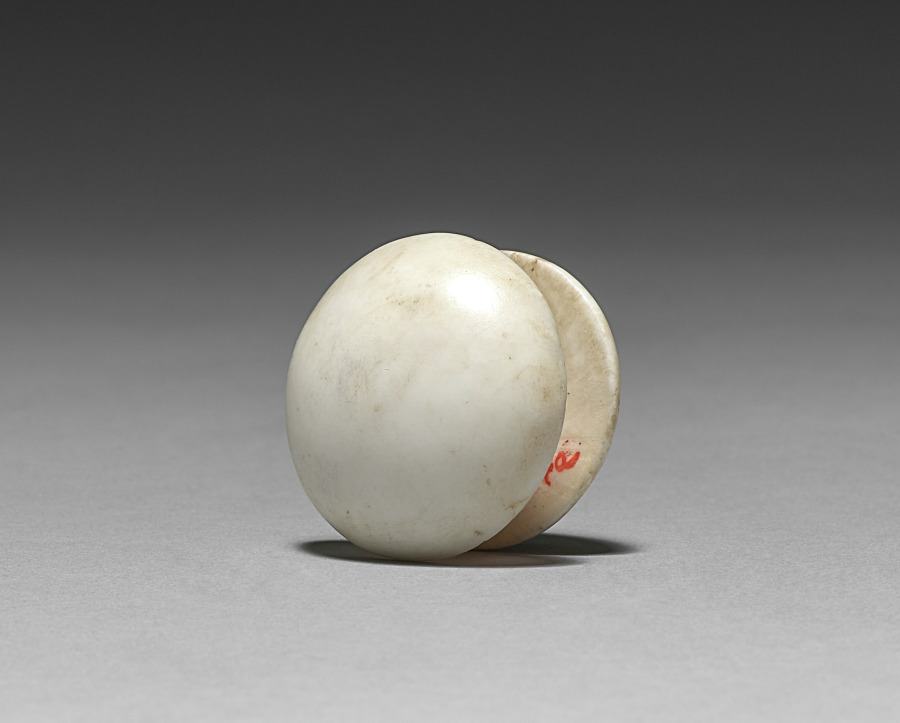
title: Pair of Ear Studs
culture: Egypt, New Kingdom (1540–1069 BCE), Dynasty 18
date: 1540–1296 BCE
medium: travertine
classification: Jewelry